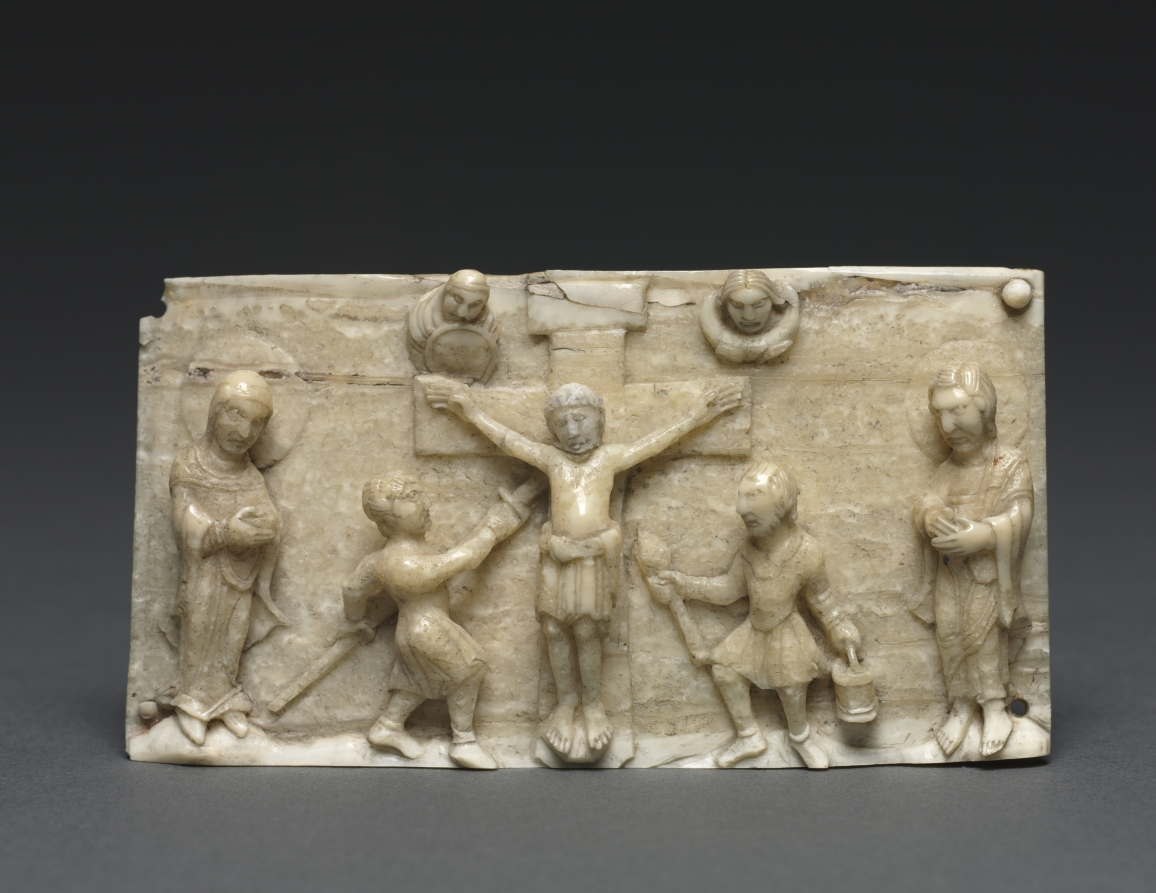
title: Plaque from a Portable Altar Showing the Crucifixion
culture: Germany, Lower Rhine Valley, Romanesque period, 11th century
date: 1050–1100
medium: walrus ivory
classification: Ivory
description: These intricately carved ivory panels once decorated the sides of a portable altar. Three of the plaques, those depicting Christ in Majesty and his apostles, were the first major acquisition of William M. Milliken, the museum's first curator of decorative arts and later director (1930–58). They were purchased from Emile Rey, the New York partner of Arnold Seligmann, Rey and Company, who had been closely associated with J. P. Morgan, Henry Walters, and other important American collectors. The fourth plaque, depicting the Crucifixion, was donated by Arnold Seligmann, Rey and Company later the same year. As Milliken later recalled, the pieces Rey showed him "were immensely intriguing, monumental in scale, even if tiny in size, the Christ in the Mandorla could have been enlarged and would have graced the tympanum of a great cathedral. . . . These morse [that is, walrus] ivories overwhelmed me . . . Somehow they must come to Cleveland. How was the question. Yet they would and must."